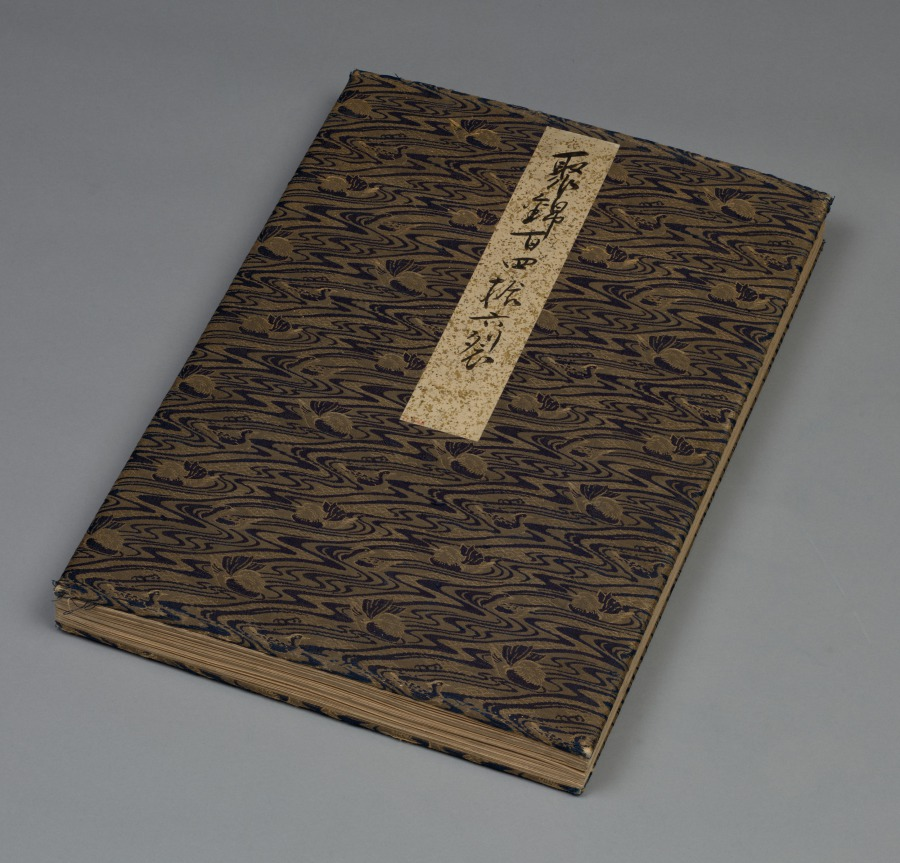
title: Album of Textile Samples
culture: Japan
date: 1790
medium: silk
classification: Textile